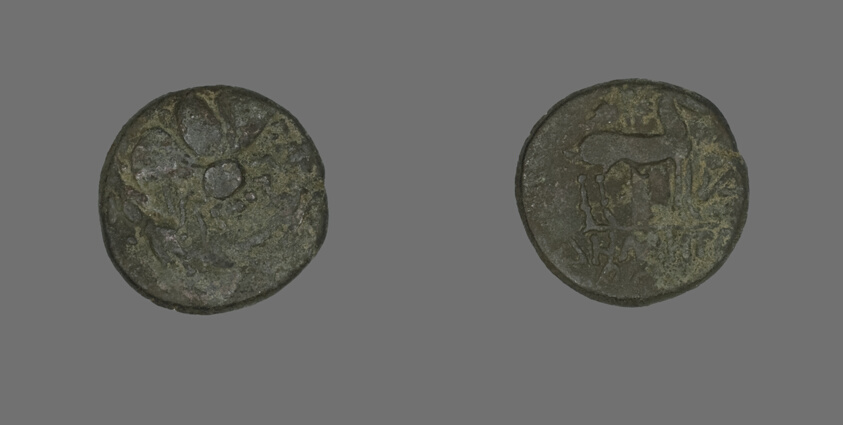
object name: Coin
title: Coin Depicting a Wreath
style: greek, ancient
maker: Greek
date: 202-133 BCE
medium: Bronze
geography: Ancient Greece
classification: coin; ancient art